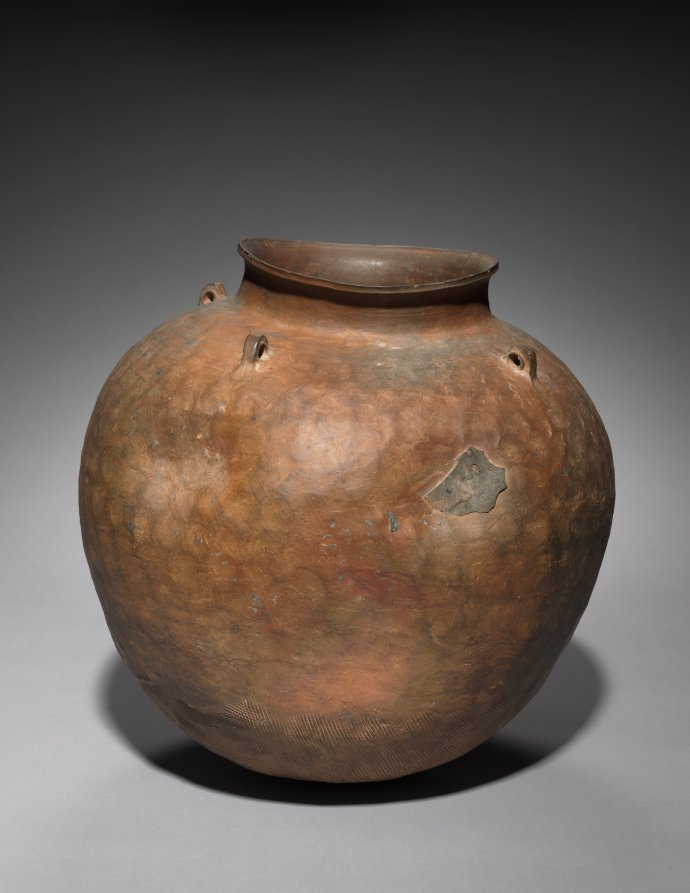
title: Short-necked Storage Jar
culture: Korea, Three Kingdoms period (57 BCE–668 CE)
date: 300s CE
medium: gray earthenware with impressed cord design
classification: Ceramic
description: Early earthenware from the Three Kingdoms period is characterized by the jar's gray hue. Closed kiln chambers built on hillsides, which fired clay as high as 2000°F, maintained a low level of oxygen saturation. The loops on its round shoulder suggest that the jar once had a lid fastened by cords. The function of this type of large jar remains unknown, yet it is highly possibly that it was used to store harvested grains and seeds. The pounding technique (tanal in Korean) used to treat the surface strengthened the clay body.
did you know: The surface of this pottery jar was treated by the pounding technique.